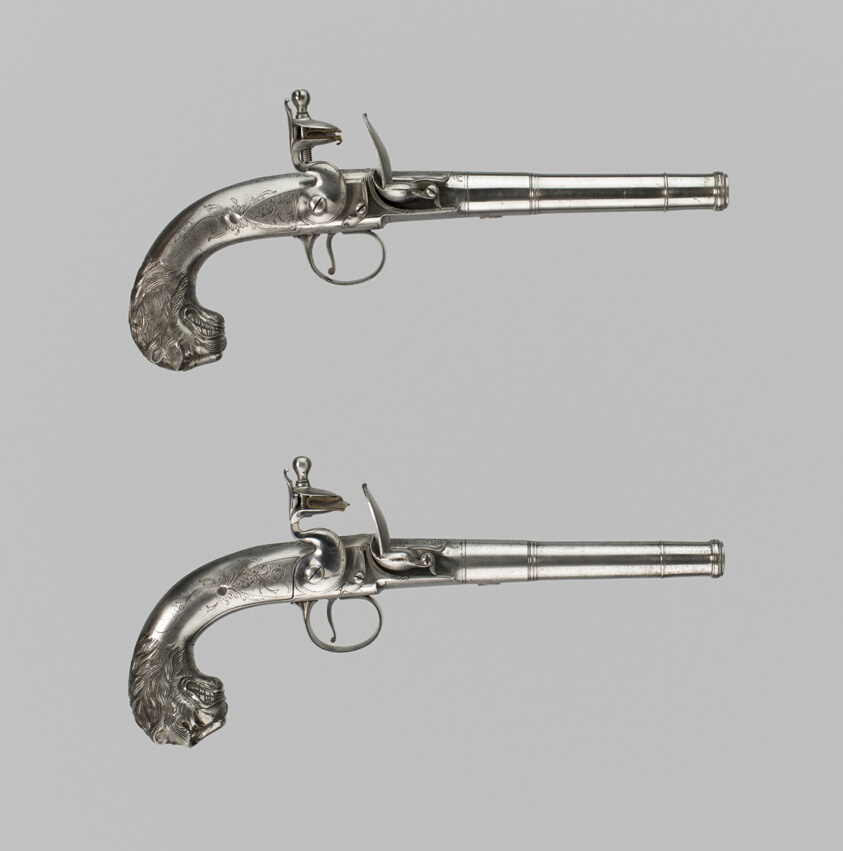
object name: Arms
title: Pair of Flintlock Turn-Off Pistols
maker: English; London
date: 1760/70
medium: Steel, leather, and flint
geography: London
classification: firearm-handgun; arms; arms and armor